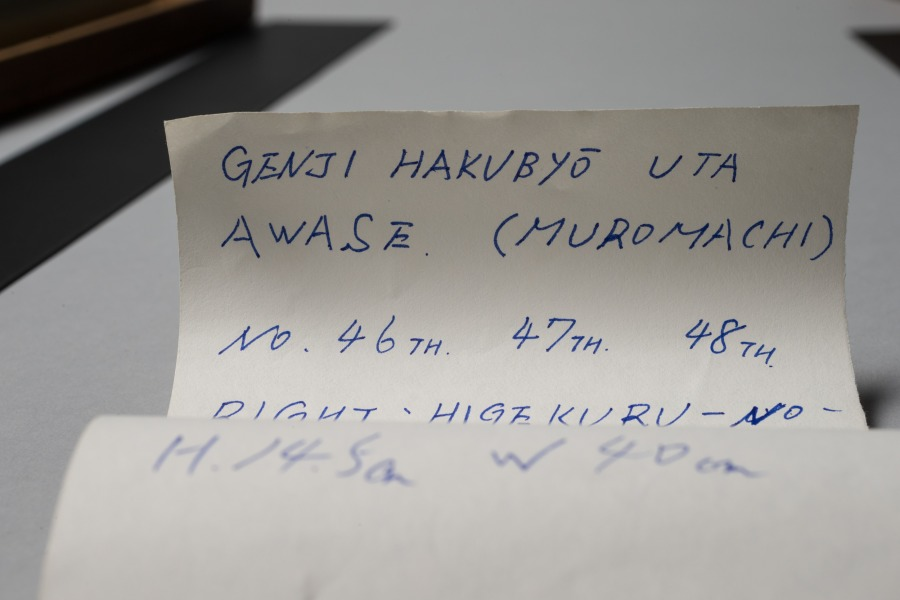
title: Section of an Illustrated Tale of Genji Poetry Contest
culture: Japan, Muromachi period (1392–1573)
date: 1400s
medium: section of a handscroll mounted as a hanging scroll; ink on paper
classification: Painting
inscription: 四十六番 左 ひげくろの大将 心さえ空にみだれし雪の［も」夜に ひとりさえつるかたしきの袖／ 四十七番 うきことを思ひさわ げばさまざまに くゆるけむりぞ いとど たち そふ／ 四十八番 すがくれてかず にも あらぬ かりのこを いづかたにかはとりかくすべき／ 右 雲井のかり かぎりとてわすれがたきを わするるも こや世に なびくこころな るらむ／ あさきなを いひ ながしける かわ ぐちは いかが もらしし せきのあらがき／ あわれをもいかに しりてか なぐさ めむ あるや 恋しき なきや かなしきに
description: This hanging scroll was once part of a handscroll depicting a waka (thirty-one syllable verse) poetry contest between characters from the 11th-century literary classic Tale of Genji. In this section, a woman known informally as Kumoi no kari, or “Goose in Fog,” after a lovelorn line she hums in the novel, is pitted against Higekuro no taishō, or “General Blackbeard.” Three of his poems, numbered 46 to 48, from “The Handsome Pillar” chapter appear over his image. The subsequent three poems inscribed above Kumoi no kari are presented as her “responses,” and come from "The Plum Tree Branch", “New Wisteria Leaves”, and "Evening Mist" chapters.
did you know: General Blackbeard laments having smelly ash poured upon him by his angry wife in one of the poems.